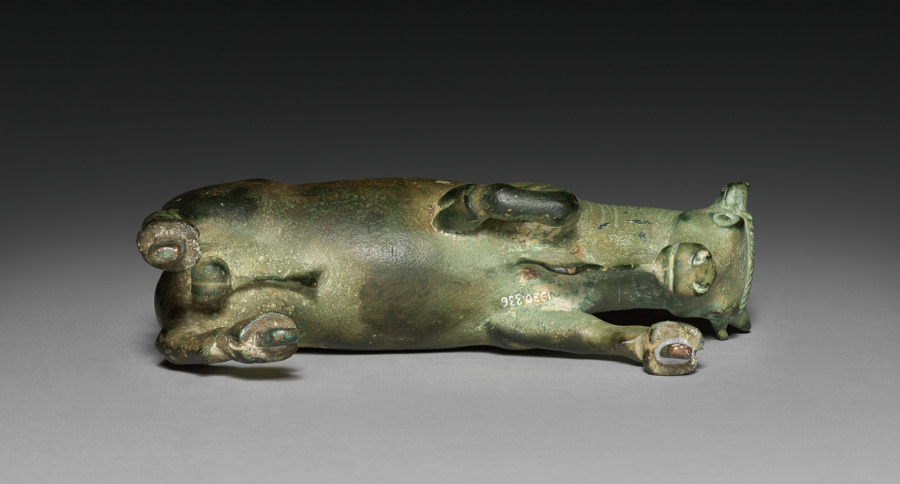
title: Pawing Bull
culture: South Italy, Lucania, Greek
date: 500–475 BCE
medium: bronze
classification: Sculpture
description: With its head slightly lowered and right foreleg raised in a pawing motion, this robust bull seems poised for action. The pose closely resembles that of bulls on coins minted at Thurii, a Greek colony in South Italy, but the statuette seems earlier in date and could have other associations. Perhaps the bull once carried the princess Europa, for example, or battled a lion or a hero. Alternatively, it may have stood alone as a small-scale offering, representing the actual bulls sometimes sacrificed to deities.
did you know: This solid-cast bronze bull is nearly intact, missing only its tail.